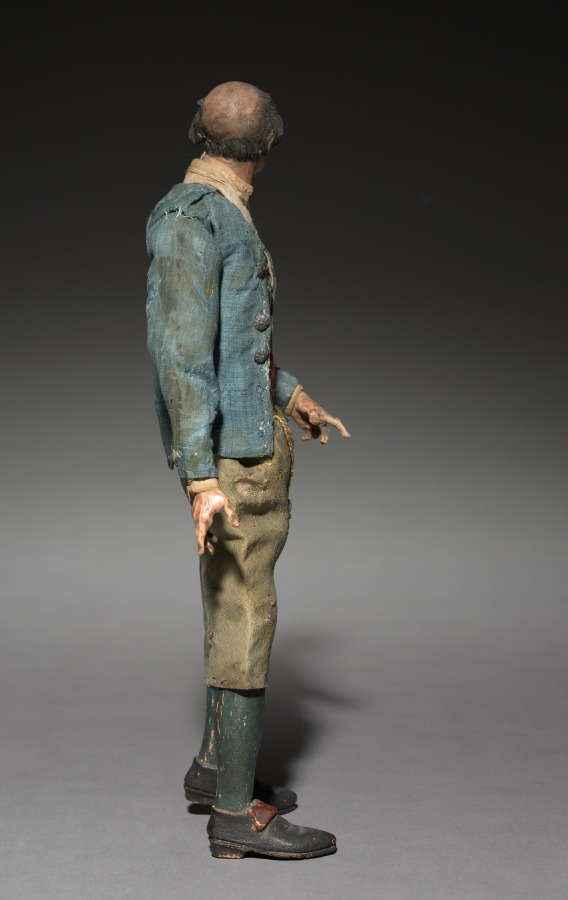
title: Figure from a Crèche: Standing Man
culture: Italy, Naples, late 18th-early 19th century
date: 1780–1830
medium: painted wood and terracotta with various textiles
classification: Sculpture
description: The practice of creating scenes of the Nativity for the home dates from the early 1700s in Italy, where people began to set up doll-like figures of about a foot or less in height. The custom was particularly popular in Naples around 1800, where crèche scenes (crèche means cradle, or crib) included many figures, whose heads and hands of painted terracotta, stuffed cloth bodies, and clothing adapted from contemporary local costumes gave them an amazingly realistic character. Representations of the birth of Jesus can be traced to the first few centuries of Christianity. Both living creatures and sculptural depictions of them were used from early times. By the late middle ages it was customary to create life-size figures of wood or stone, naturalistically painted, to represent the characters who participated in the events of Jesus's early life. These sculptures were then arranged in scenes illustrating one or both of the most important of these events, the Adoration of the Shepherds and the Adoration of the Magi—the three kings from the East who came to pay homage to the Christ child. Used in churches, these large figures were especially popular in Italy, Central Europe, Spain, and Portugal.